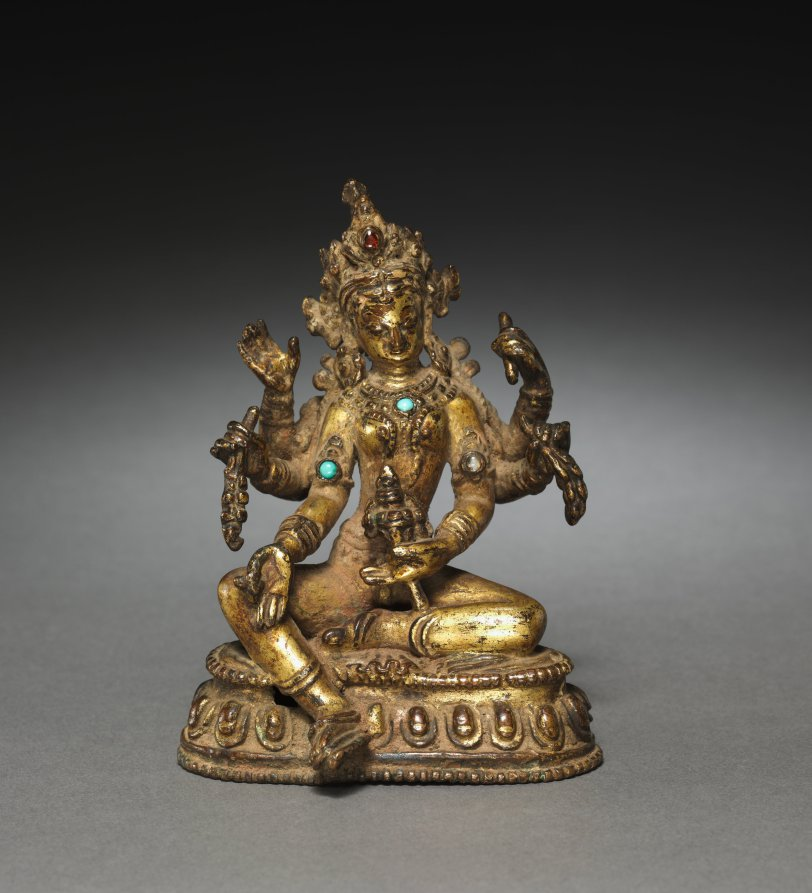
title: Seated Vasudhara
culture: Nepal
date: c. 1300s(?)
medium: brass or bronze; turquoise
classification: Sculpture